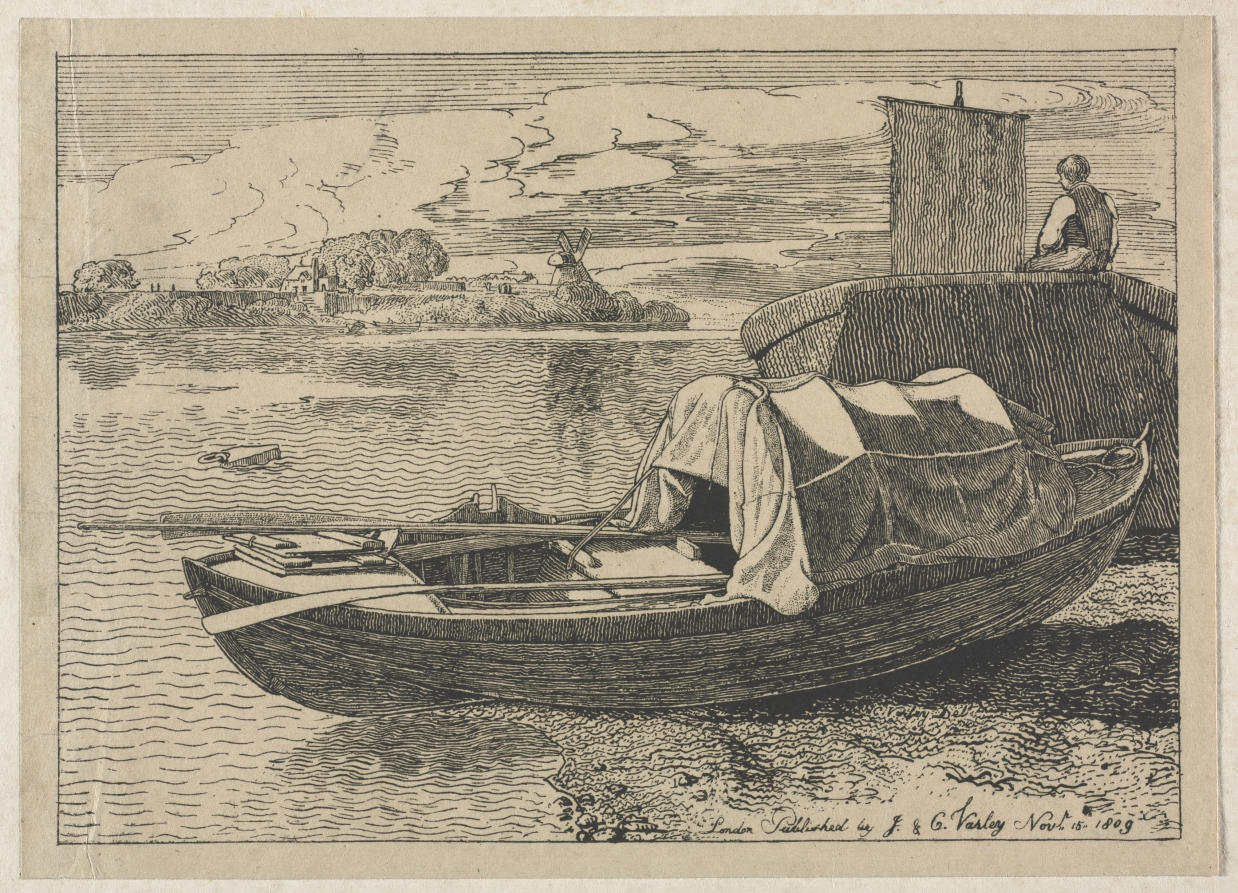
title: Boats on a River, Windmill in Distance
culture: England, 19th century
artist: Cornelius Varley (British, 1781–1873)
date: 1809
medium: lithograph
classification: Print